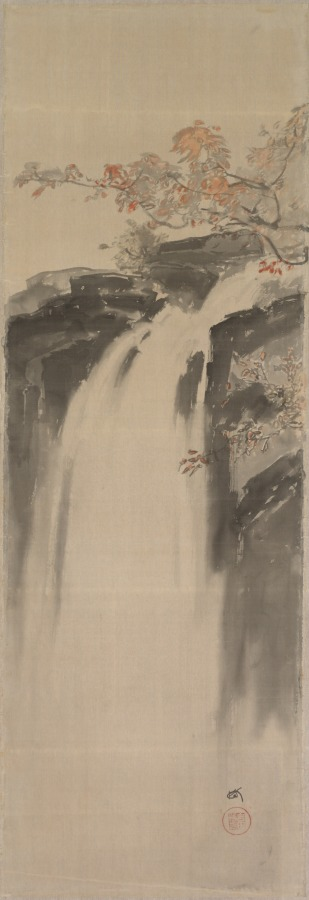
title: Waterfall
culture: Japan, Taishō period (1912–26)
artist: Yoshida Hiroshi (Japanese, 1876–1950)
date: 1924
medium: unmounted hanging scroll; ink and color on silk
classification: Painting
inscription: signed and stamped in lower right corner.